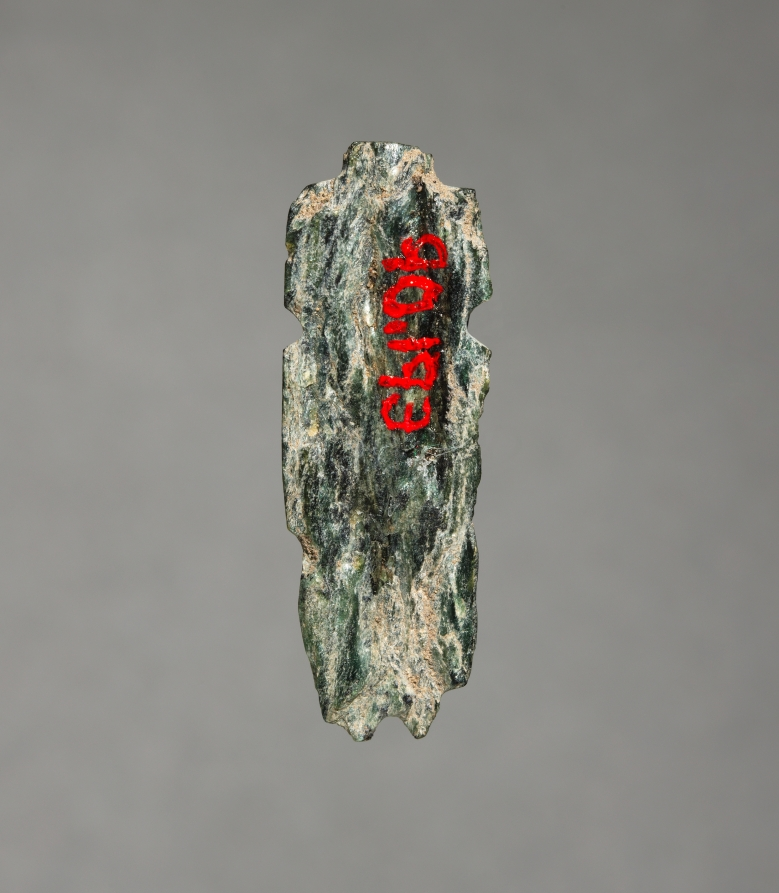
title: Miniature Figure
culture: Mesoamerica, Mexico, Guerrero, Mezcala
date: 100 BCE–300 CE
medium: serpentine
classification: Sculpture